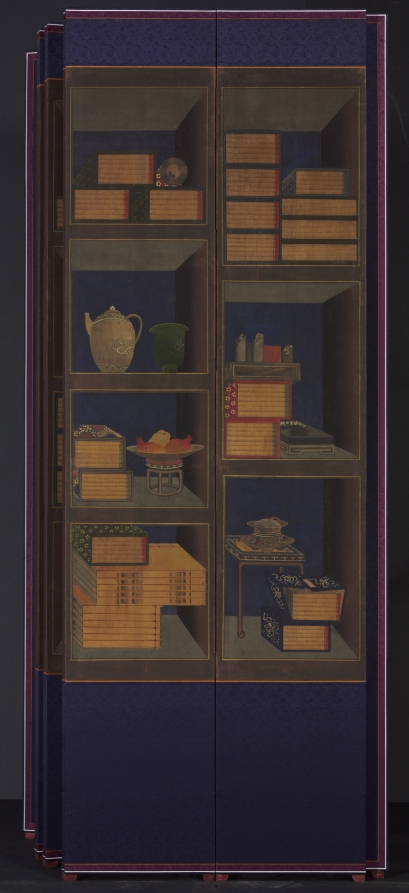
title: Books and Scholars’ Accoutrements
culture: Korea, Joseon dynasty (1392–1910)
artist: Yi Taek-gyun (Korean, 1808–after 1883)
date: late 1800s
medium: ten-panel folding screen; ink and color on silk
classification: Painting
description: First produced around the second half of the eighteenth century, chaekgado (literally, “pictures of bookshelves”) flourished throughout the 1800s as a royal emblem. And soon this pictorial genre became a popular furnishing item for aristocrats' elegant studies. The third panel from the right bears a hidden seal that reveals the artist: Yi Taek-gyun, a prominent court artist active in the late 1800s.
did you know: A convincing hypothesis that connects the Korean chaekgado tradition with the Renaissance tradition of illusionistic studiolo through the technique of trompe-l'œil and Chinese Qing period treasured cabinet paintings was first made in Park Shim-eun's thesis (2002).